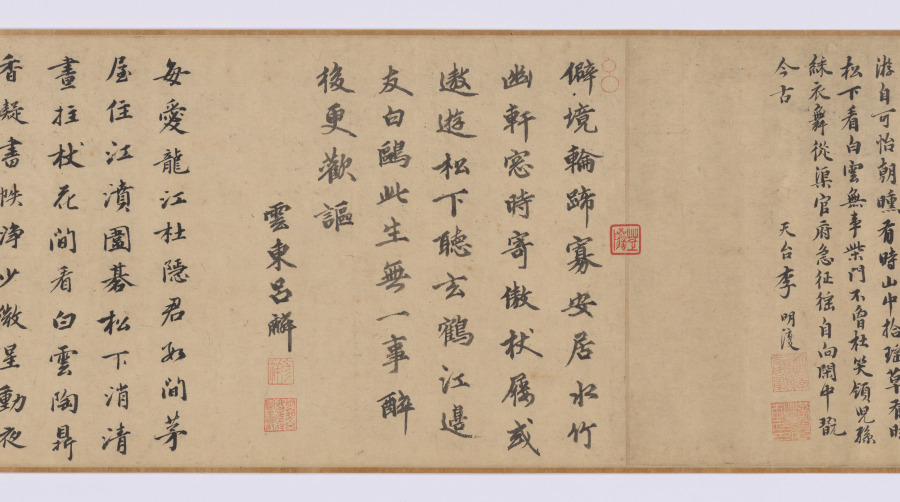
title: Leisure Enough to Spare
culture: China, Yuan dynasty (1271-1368)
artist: Yao Tingmei (Chinese, active mid-1300s)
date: 1360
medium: handscroll, ink on paper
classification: Painting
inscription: 至正廿年春正月_日作此併系鄙語于尾 地偏人遠閉柴關，滿院松陰白晝閒。 眼底風塵渾忘却，坐看流水臥看山。 吳興姚廷美畫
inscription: 23 colophons and 53 seals (dates unavailable for some): 1 colophon, dated 1360, and 2 seals of Yang Weizhen (1296-1370); 1 colophon and 3 seals of Wan Yi; 1 colophon of Zhang Junde; 1 colophon and 3 seals of Angji (act. ca. mid-14th c.); 1 colophon and 1 seal of Xu Shiquan; 1 colophon and 3 seals of Gao Yu; 1 colophon and 2 seals of Li Mingfu; 1 colophon and 2 seals of Lu Lin; 1 colophon and 1 seal of Zhang Qian; 1 colophon of Tao Tangwen; 1 colophon and 1 seal of Wu Yuangui (act. ca. 1300-60); 1 colophon of Bao Jiong; 1 colophon of Wang Zao; 1 colophon and 1 seal of Ma Chuyi; 1 colophon and 1 seal of Lin Yizhuang; 1 colophon and 1 seal of Gu Shunju; 1 colophon and 2 seals of Wang Jing; 1 colophon and 2 seals of Lin Shouchang; 1 colophon and 1 seal of Gao Zhidao; 1 colophon of Lin Xun; 1 colophon, dated 1359, and 2 seals of Meng Weicheng (act. mid-14th c.); 1 colophon and 1 seal of Meng Zhiji (act. mid-l4th c.); 14 seals of Liang Qingbiao 梁清標 (1620-1691); 1 poem dated 1755 and 5 seals of the Qianlong 乾隆 emperor (r. 1736-95); 2 seals of the Jiaqing 嘉慶 emperor (r. 1796-1821); 3 seals of the Xuantong 宣統 emperor (r. 1909-11).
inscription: Title on frontispiece by Zhang Bi 章弼: Signed Gongchen 拱辰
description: Seclusion and leisure—the ideals of the literati, or scholar-gentlemen—are expressed in this mature work by Yao Tingmei. The theme acquired special meaning at a time of the military uprisings near the end of the Yuan dynasty. Dedicated to an ascetic named Du, this work combines painting, calligraphy, and poetry; following the painting are more than 20 poems and essays written by notable scholars, one of whom was the calligrapher Yang Weizhen. It reveals not only the aesthetic taste of the literati but also the practice of contributing artistic and literary works to fulfill social obligations. Yao's painting demonstrates his individual style derived from various ancient masters (Guo Xi, Dong Yuan, and Juran). Yang Weizhen's calligraphy exhibits his bold, vigorous style and his intent to capture the spirit of antiquity in art.